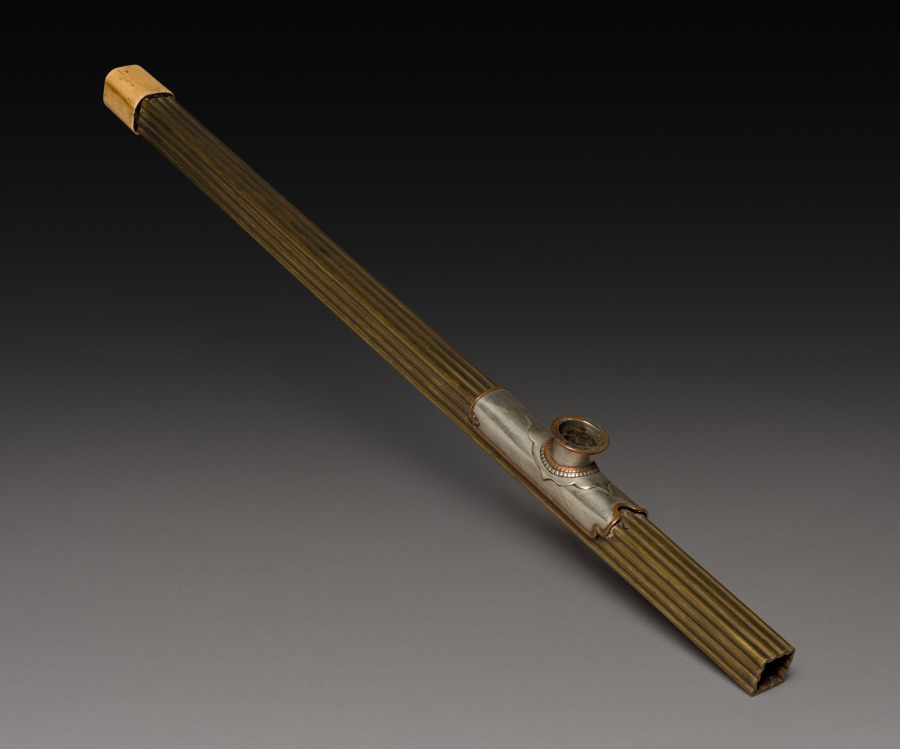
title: Opium Pipe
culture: China, Qing dynasty (1644-1911)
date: 1800s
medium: brass, ivory, pottery and copper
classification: Miscellaneous